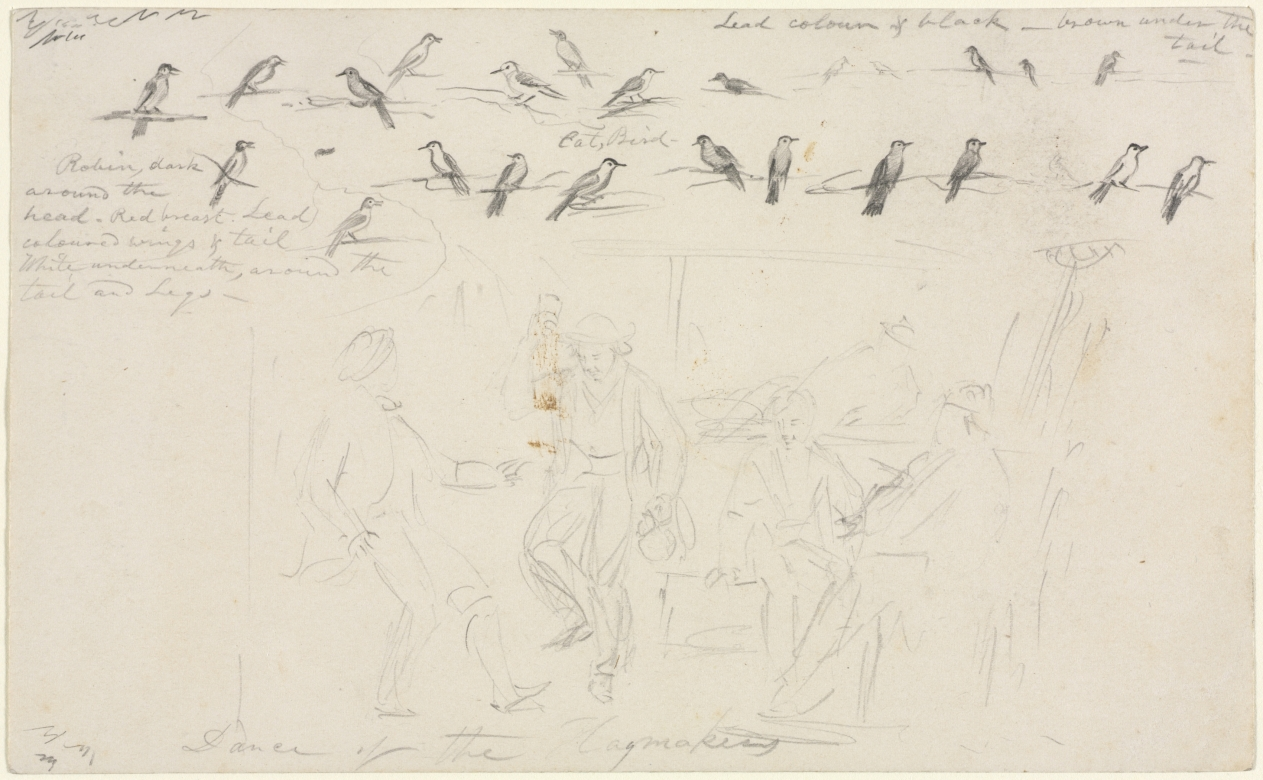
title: Dance of the Haymakers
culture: America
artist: William Sidney Mount (American, 1807–1868)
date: c. 1845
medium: graphite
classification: Drawing